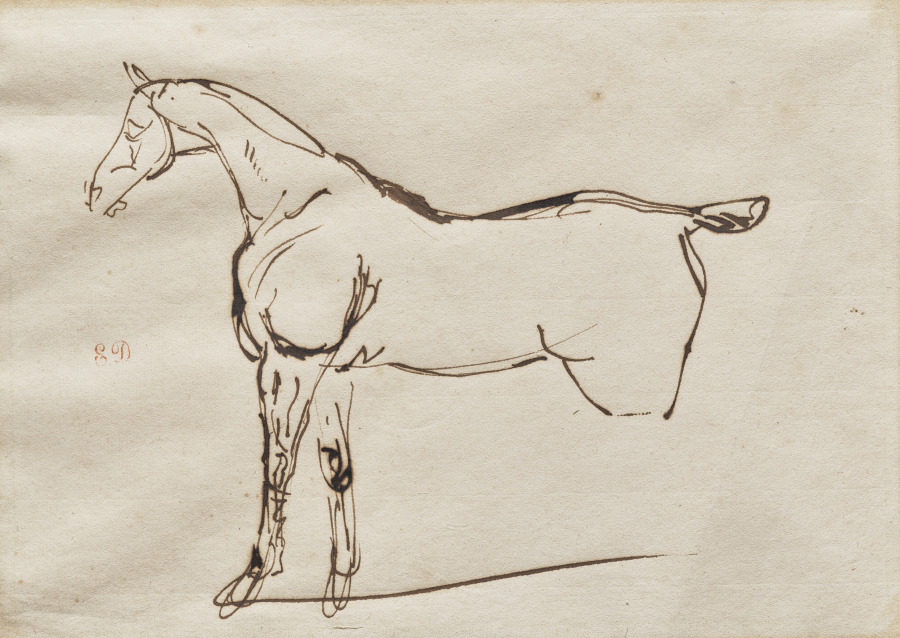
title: Study of a Horse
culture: France, 19th century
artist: Eugène Delacroix (French, 1798–1863)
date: c. 1825–30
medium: Pen and brown ink on cream laid paper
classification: Drawing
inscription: stamped, in red ink, at center left: E.D. [Lugt 838a]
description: Eugène Delacroix repeatedly depicted horses throughout his career, visiting stables to observe the animals at rest and in motion. This sheet is likely one such example made from life. Delacroix loosely sketched the horse's form, concentrating on the tension of its front legs and leaving the rest of its body loosely rendered. Through such exercises, the artist hoped to eventually master this subject.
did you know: Although Eugène Delacroix created a realistic representation of a horse in this drawing, the animals sometimes served as symbols for the conflict between man and nature in his work.